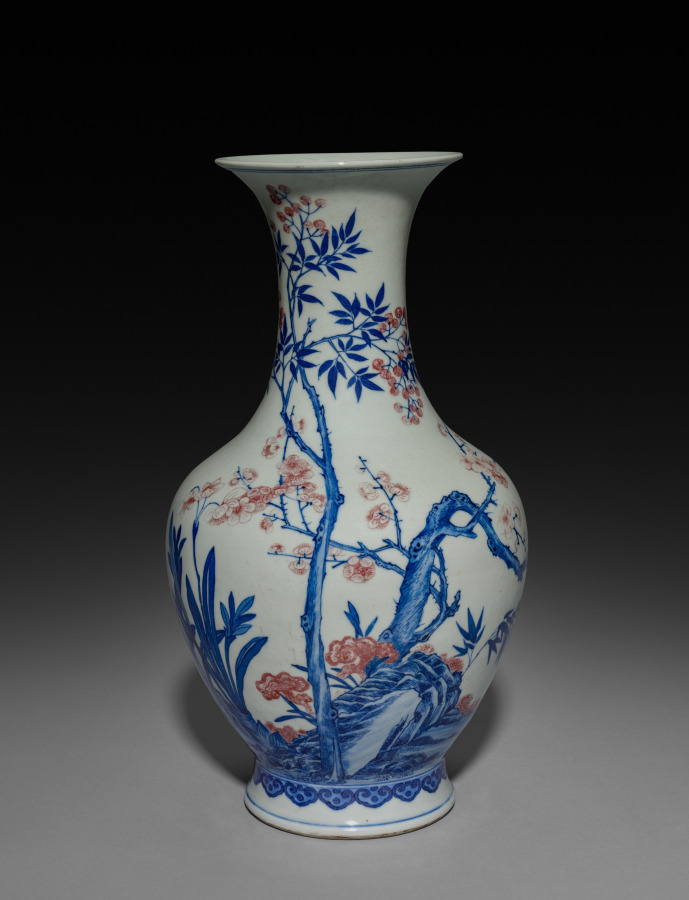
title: Vase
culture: China, Jiangxi province, Jingdezhen kilns, Qing dynasty (1644-1911), Yongzheng reign (1723-35)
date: 1723–35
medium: porcelain with underglaze blue and red decoration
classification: Ceramic